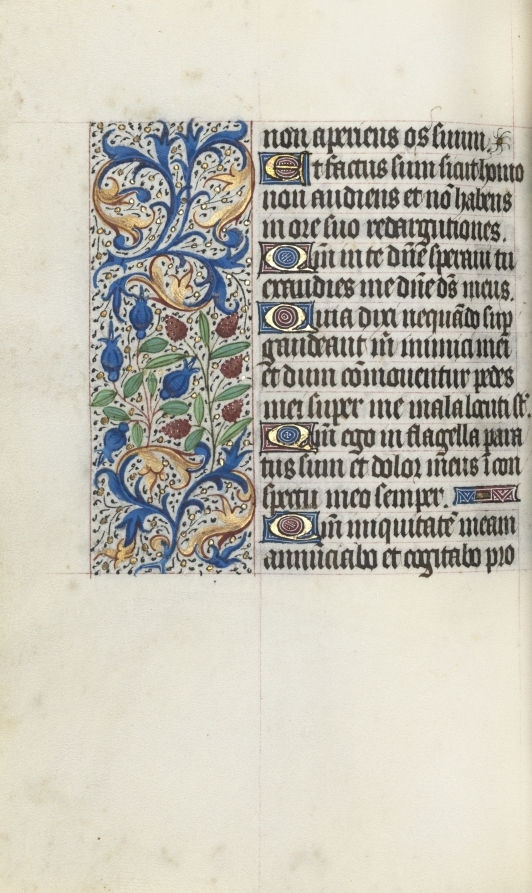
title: Book of Hours (Use of Rouen): fol. 84v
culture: France, Rouen, 15th century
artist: Master of the Geneva Latini (French, active Rouen, 1460–80)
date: c. 1470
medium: ink, tempera, and gold on vellum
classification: Bound Volume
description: In the late 1400s and early 1500s Rouen was an established and important center of book production. The city’s cathedral had a wealthy chapter that spent large sums of money to commission books and to maintain its extensive library. The stationers and booksellers would have likely been concentrated in or near the cathedral precinct. This artist, named after a manuscript now in Geneva, was Rouen’s principal illuminator during the second half of the 1400s.